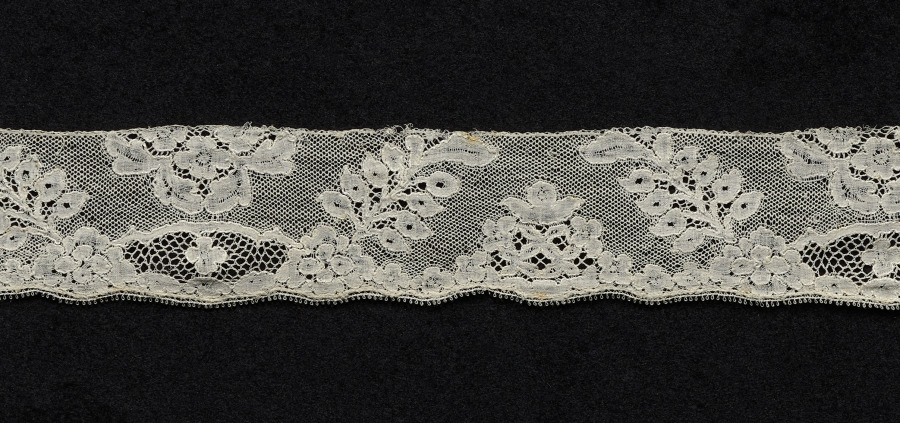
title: Lace Edging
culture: Belgium, Mechelen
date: 1740–60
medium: Bobbin lace outlined with silk cordonnet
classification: Lace